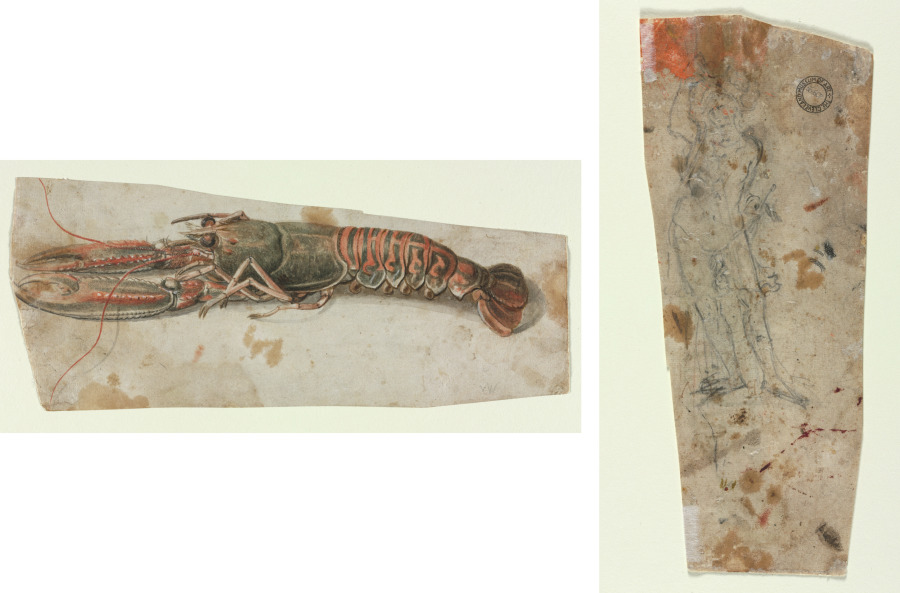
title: Lobster (recto) Sketch of an Armoured Male Figure (verso)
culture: Flanders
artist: Anonymous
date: 1600s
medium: brush and black, gray and brown wash, and red watercolor, heightened with white gouache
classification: Drawing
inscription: lower right, in graphite: XW